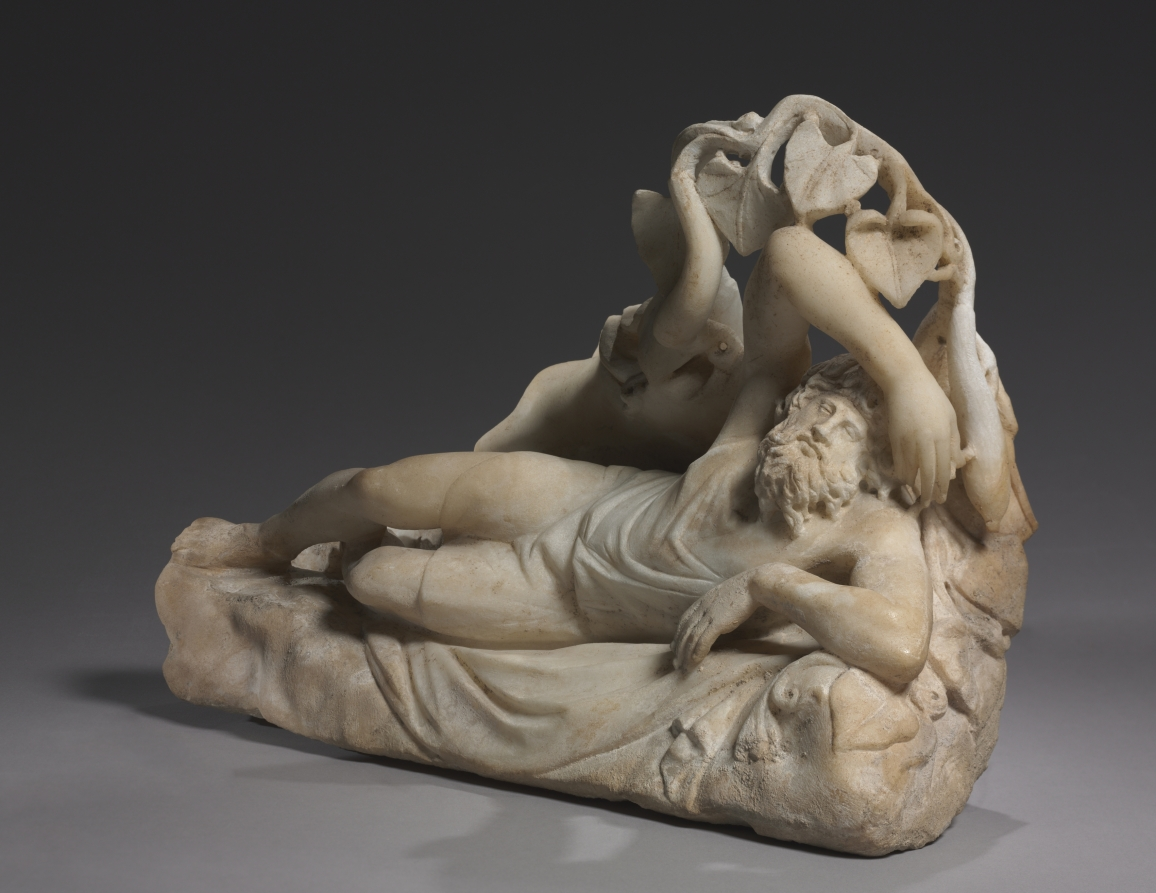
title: Jonah Under the Gourd Vine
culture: Anatolia, late Roman-early Christian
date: 280–90 CE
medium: marble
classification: Sculpture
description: After disobeying the Lord’s command to proclaim judgment on the city of Nineveh, the Old Testament prophet Jonah was cast into the sea, swallowed by a sea monster, and ultimately cast ashore. When asked a second time, Jonah obeyed the Lord but became displeased when the city was spared. After pleading for Nineveh’s destruction, Jonah left the city and rested in the shadow of a large gourd vine. The Lord, however, made the vine wither, exposing Jonah to the burning sun.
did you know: The sculpture shows the dramatic moment when the Jonah, having languished in the desert, is saved by the shade of a gourd vine. The sculptor paid great attention to detail such as Jonah's bushy beard echoing the large leaves overhead.